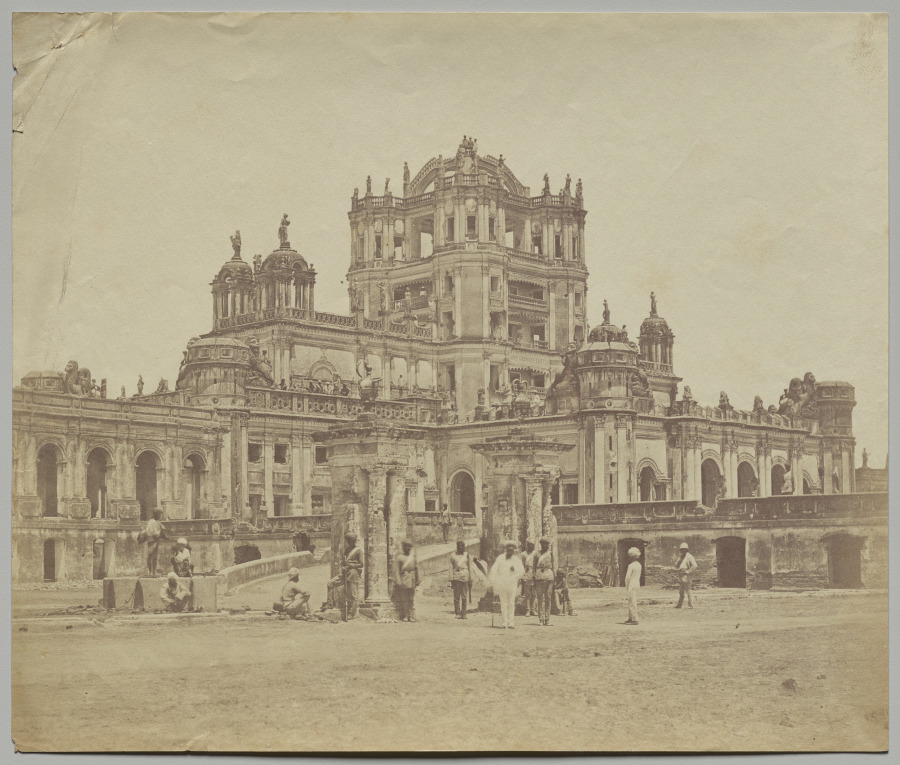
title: The Martinière College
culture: England, 19th century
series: Lucknow After the Siege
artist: Felice A. Beato (British, 1832–1909)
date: 1858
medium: albumen print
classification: Photograph